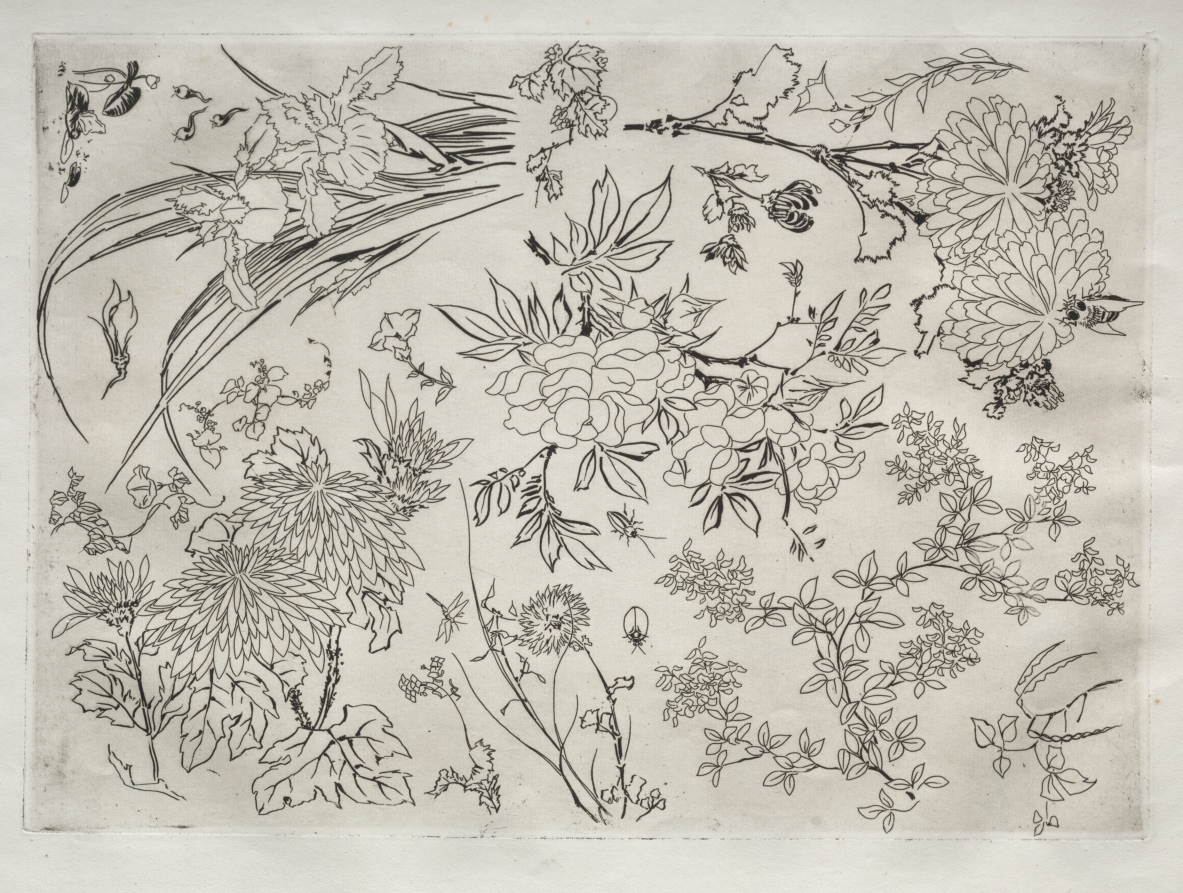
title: Dinner Service (Rousseau service): Flowers (no. 23)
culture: France, 19th century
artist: Félix Bracquemond (French, 1833–1914)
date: 1866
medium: etching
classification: Print